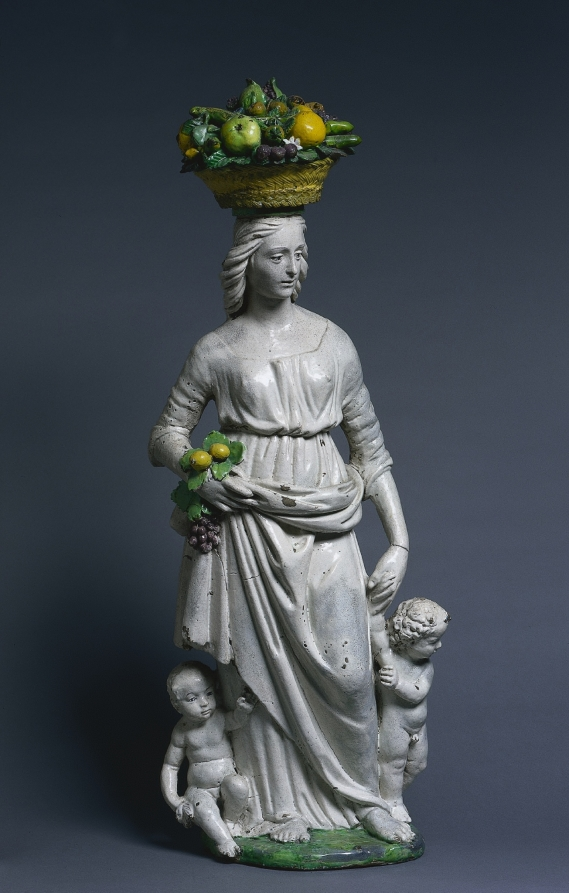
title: Dovizia (Plenty)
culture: Italy, Florence, 16th century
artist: Giovanni della Robbia (Italian, 1469–1529/30)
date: c. 1520–29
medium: glazed terracotta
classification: Sculpture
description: Many elite Florentine Renaissance homes had sculptures of idealized young women carrying nature’s bounty, such as this work. The motif stems from a statue by Donatello (about 1386–1466) that towered over Florence’s main public market. At home, however, the sculpture became a talisman for the family’s well-being. The city-state’s low birth rate was a serious political matter, and such a sculpture was believed to stimulate fertility while also promoting motherhood and bolstering financial success.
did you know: Inspired by an over life-sized, public sculpture by Donatello, Giovanni della Robbia reduced the figure for a domestic setting.